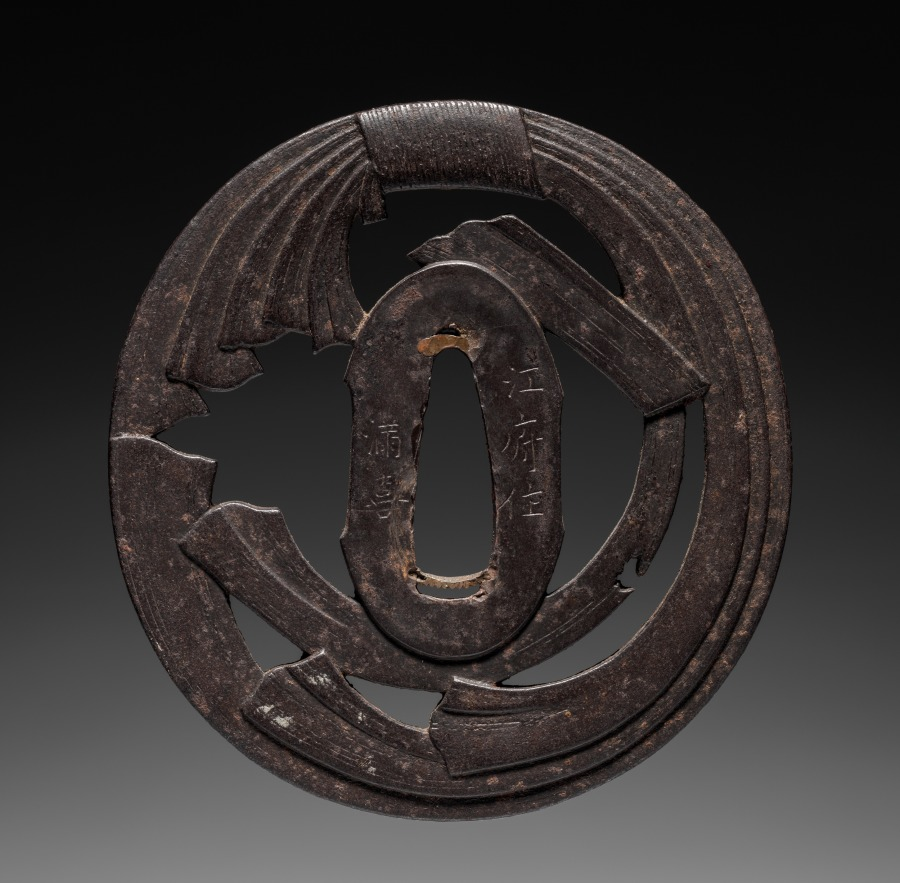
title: Sword Guard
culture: Japan, Edo period (1615–1868)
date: early 1800s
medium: iron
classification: Arms and Armor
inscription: Signed: Mitsuyoshi, residing in Kofu (Edo)